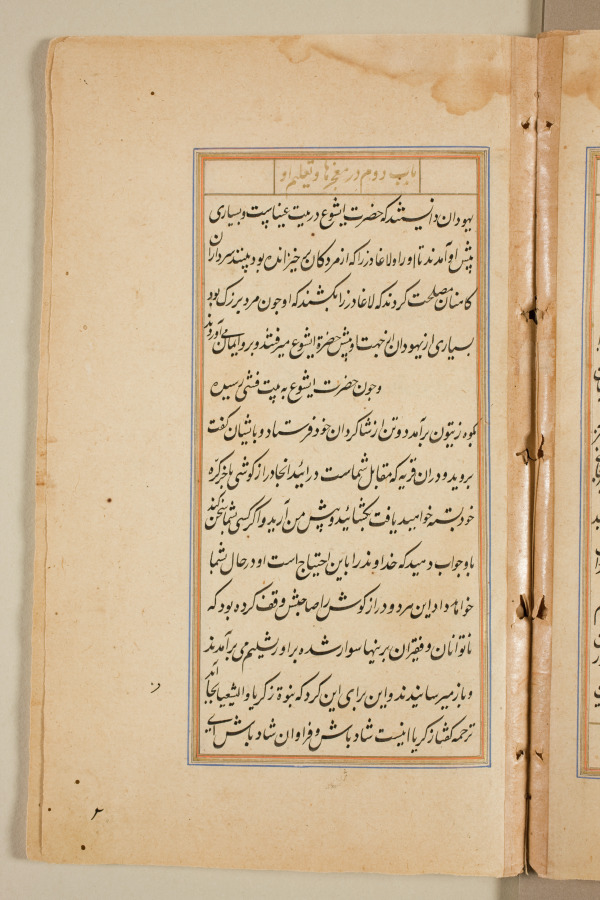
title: Text page from a Mirror of Holiness (Mir’at al-quds) of Father Jerome Xavier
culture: Mughal India, Allahabad, made for Prince Salim (1569–1627)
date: 1602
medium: Ink and gold on paper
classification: Manuscript